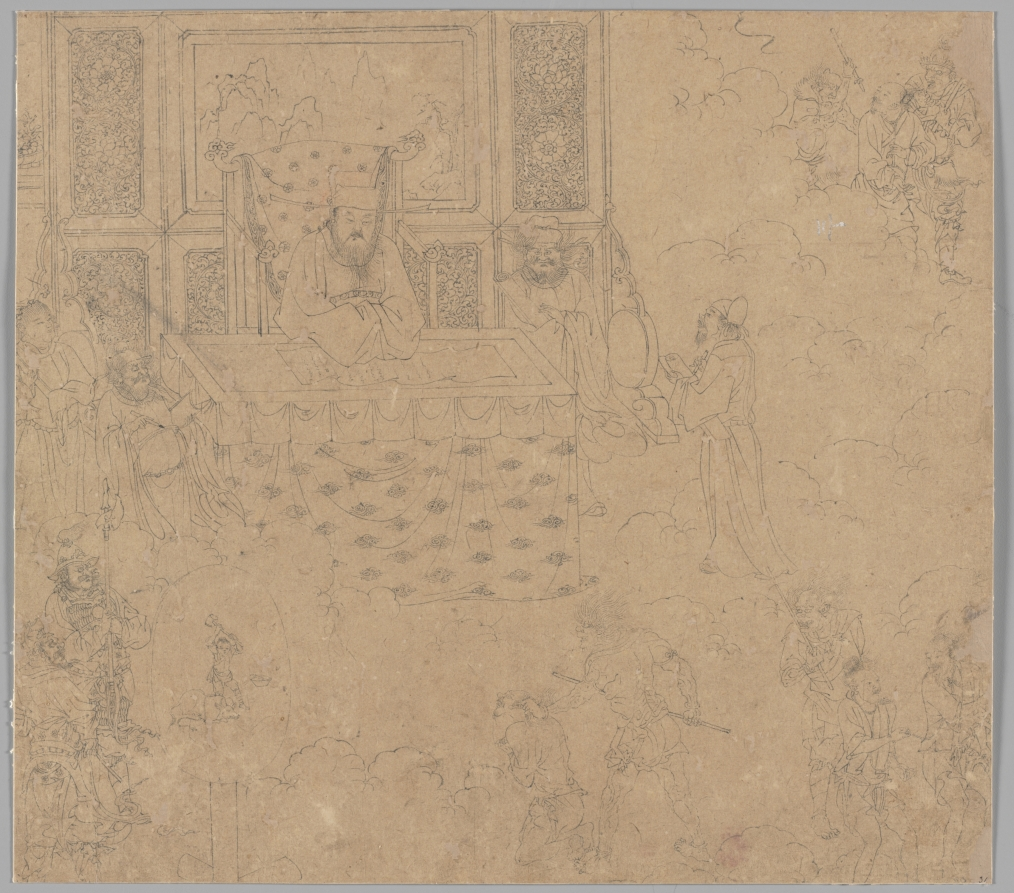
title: Album of Daoist and Buddhist Themes: Kings of Hells: Leaf 31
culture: China, Southern Song dynasty (1127-1279)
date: 1200s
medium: Album, ink on paper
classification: Painting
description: This extraordinary album has 50 paintings on a variety of religious subjects. They were likely created by several master craftsmen to share with studio apprentices as models for fulfilling commissions. The Jade Emperor and the Daoist pantheon make up the first 26 leaves. The next 14 leaves portray the Buddhist Ten Kings of Hell administering punishments to the dead. The third section, called “Clearing the Mountains,” features divine soldiers, led presumably by the deity Erlang Shen 二郎神, fighting undesirable creatures.